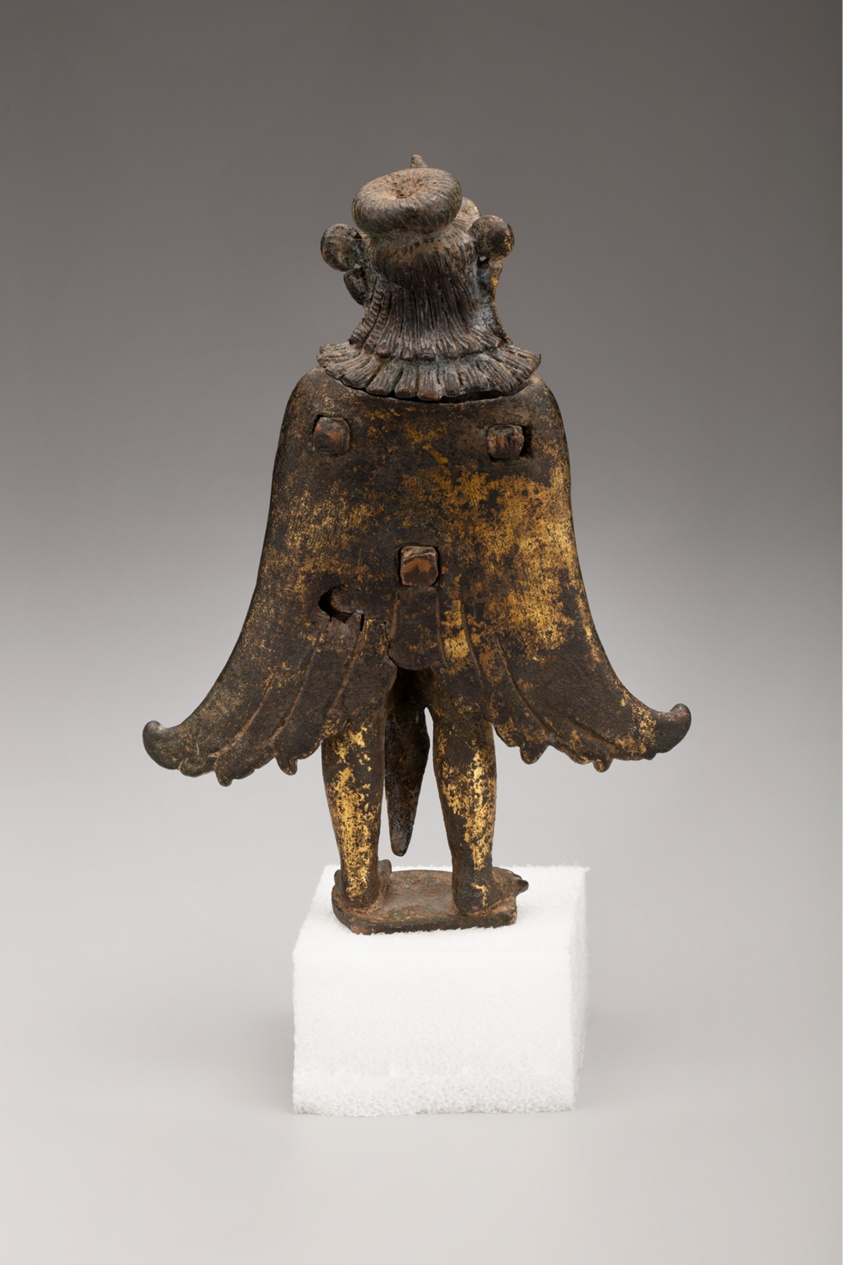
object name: Sculpture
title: God Vishnu's Mount, Garuda, Standing with Hands in Gesture of Adoration (Anjalimudra)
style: Himalayan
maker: Nepal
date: 13th century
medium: Gilt bronze with gemstones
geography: Nepal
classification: bronze; metal; sculpture; asian art